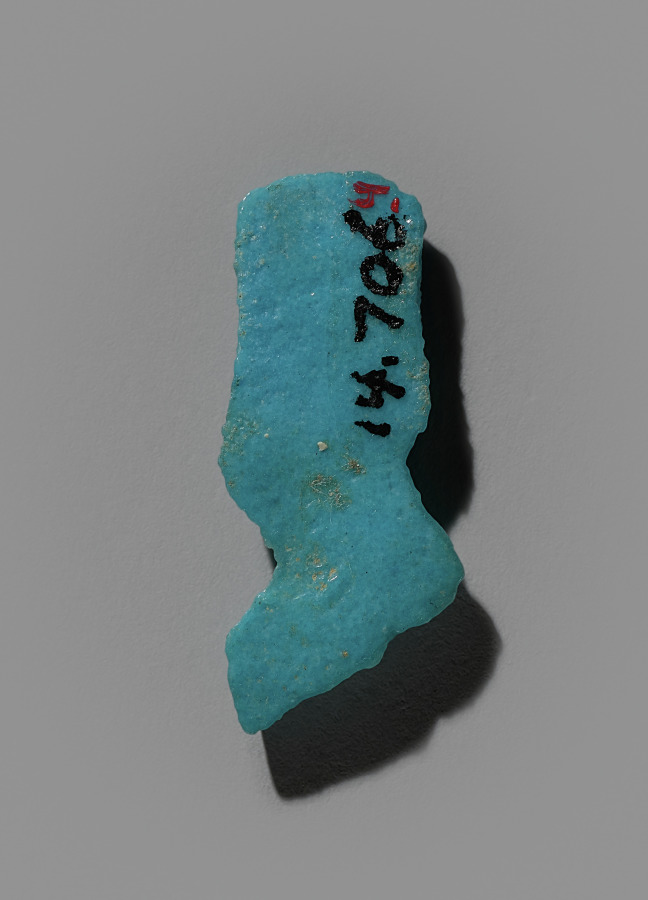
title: Food Model Amulet: Haunch of Beef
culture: Egypt, New Kingdom (1540–1069 BCE), Dynasties 19–20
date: 1295–1069 BCE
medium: turquoise faience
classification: Amulets